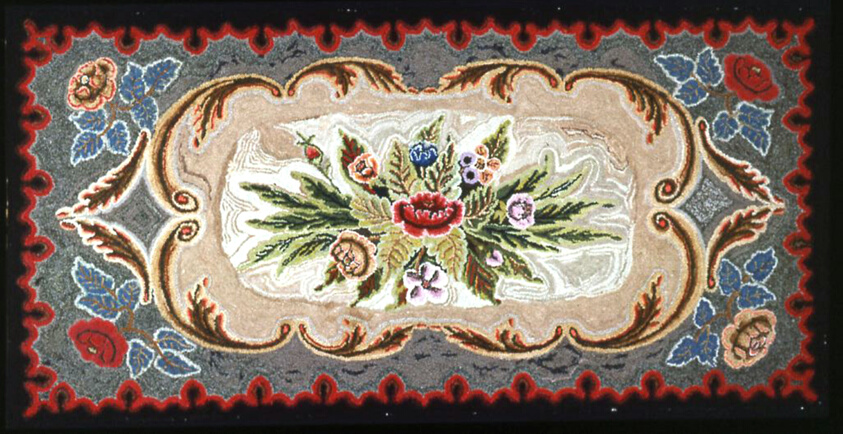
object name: Textile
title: Rug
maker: United States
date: 19th century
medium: Variety of fibers, plain weave with variety of fibers, yarns, felted, knitted, oblique interlaced and/or woven strips, forming "hooked" pile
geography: United States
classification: textile; weaving - rug